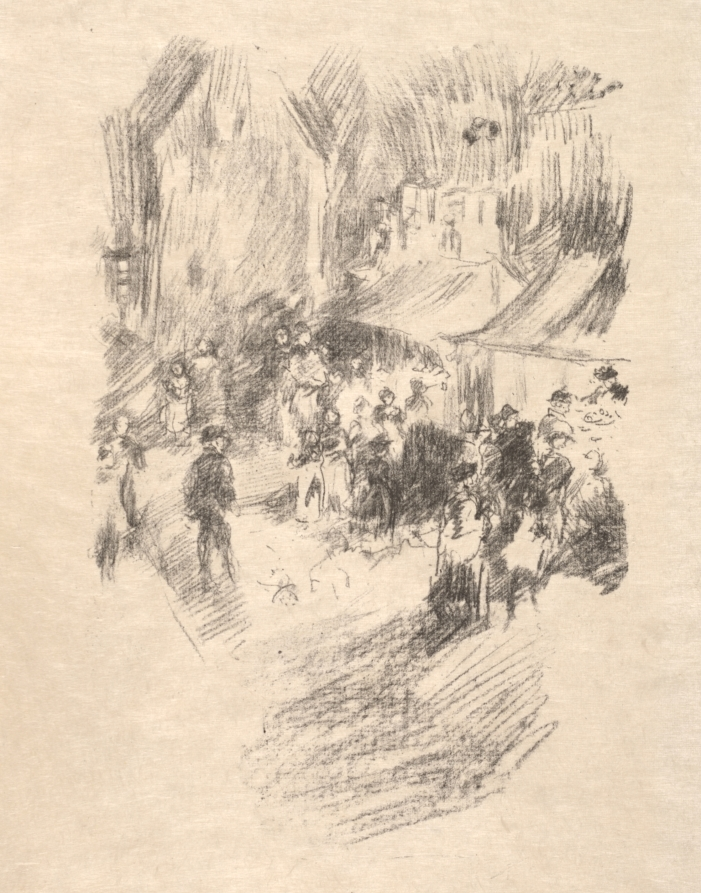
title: Fair, Lyme, -Regis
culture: America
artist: James McNeill Whistler (American, 1834–1903)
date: 1895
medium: lithograph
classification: Print